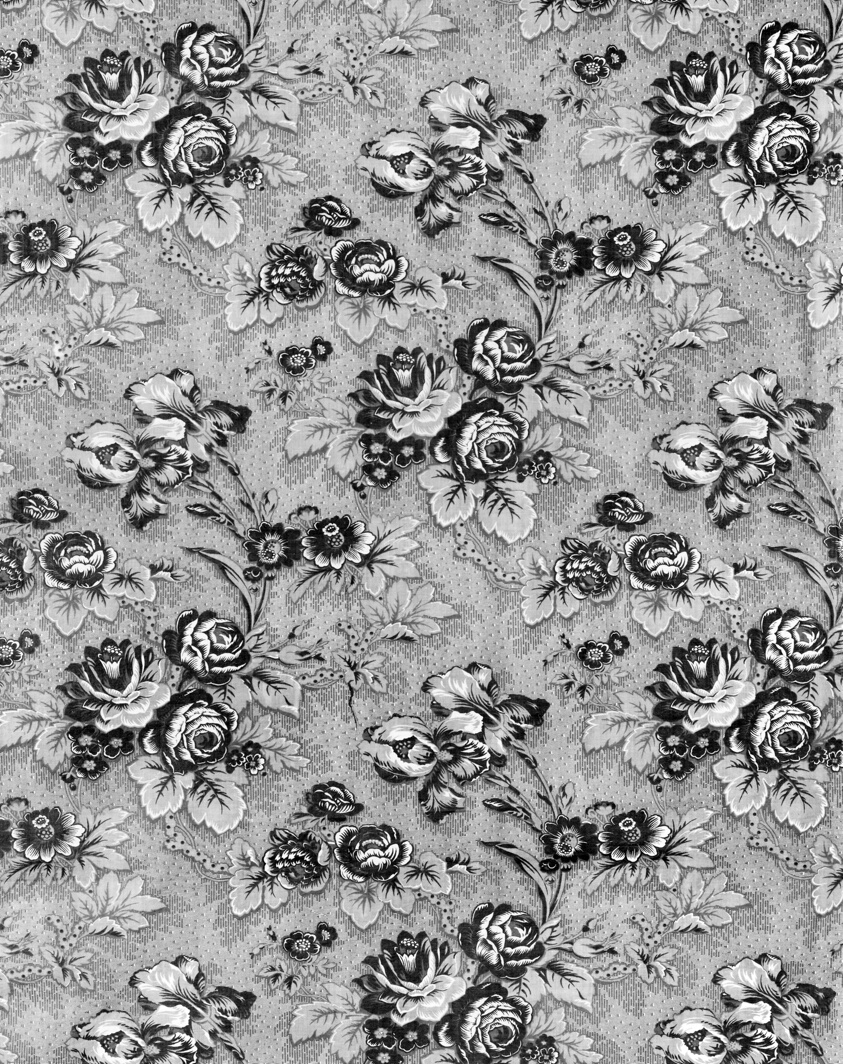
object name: Textile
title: Panel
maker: England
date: 19th century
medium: Cotton, printed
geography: England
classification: textile; weaving - printed; weaving